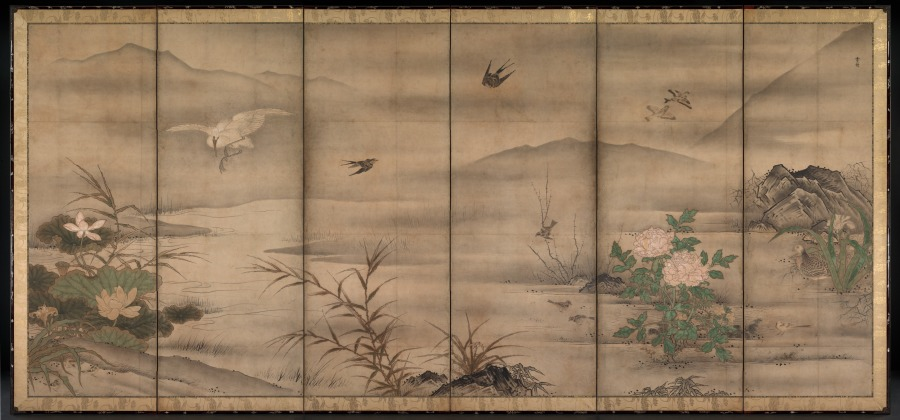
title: Birds and Flowers in a Landscape of the Four Seasons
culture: Japan, Muromachi period (1392–1573)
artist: follower of Sesshū Tōyō (Japanese, 1420–1506)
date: second half of the 1500s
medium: Six-panel folding screen, ink and color on paper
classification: Painting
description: The monk-painter Sesshū is revered today, as he was in his own time. While he left Kyoto's sophisticated intellectual and cultural environment to live in a provincial village in a far western province, he seems never to have severed contacts with the monastic communities of his young adulthood. His residence in Yamaguchi proved fortuitous because his patron, the region's military lord, enjoyed considerable freedom in conducting trade missions overseas with Korea and China. Sesshū went to China in 1467 and traveled about the country, visiting well-known historical sites and Chan (Zen) temples before returning two years later. Thus he became familiar with contemporary painting practices, materials, formats, and subject matter. His assimilation and then transmission of these elements had a profound impact on the following generations of ink painters, patrons, and Zen communities throughout Japan. Despite the presence on these byōbu of the name "Sesshū," they are from the hand of another accomplished but as yet anonymous follower active in the middle of the sixteenth century. Sesshū's name here, as on a handful of similar bird-and-flower byōbu, attests to the master's identification at that time with the colorful mural paintings on the same theme emanating from Ming dynasty China. This genre had heretofore been relegated to hanging scroll compositions, so the intro-duction into temple and daimyo residences of such an attractive theme surely caused considerable excitement in the later fifteenth century, when in all likelihood Sesshū introduced it into the Japanese painting repertoire. Subsequently, artists of varying backgrounds and training tried their hands at these large, dramatic scenes. From right to left the composition portrays an array of flowering plants in the near distance that indicate the passage of the seasons. Birds, usually paired, occupy this setting, engaged in various activities that lend naturalism and an air of peacefulness. The world they inhabit may be characterized pictorially by expansive middle-ground waterscapes that end where the far distant mountains rise as backdrops. These features appear consistently in other bird-and-flower byōbu attributed to Sesshū. Also noteworthy is the absence of any birds of prey such as the samurai's beloved hawks, emblems of fierceness and graceful strength that appear often in the byōbu of sixteenth-century Kano and Soga school painters.